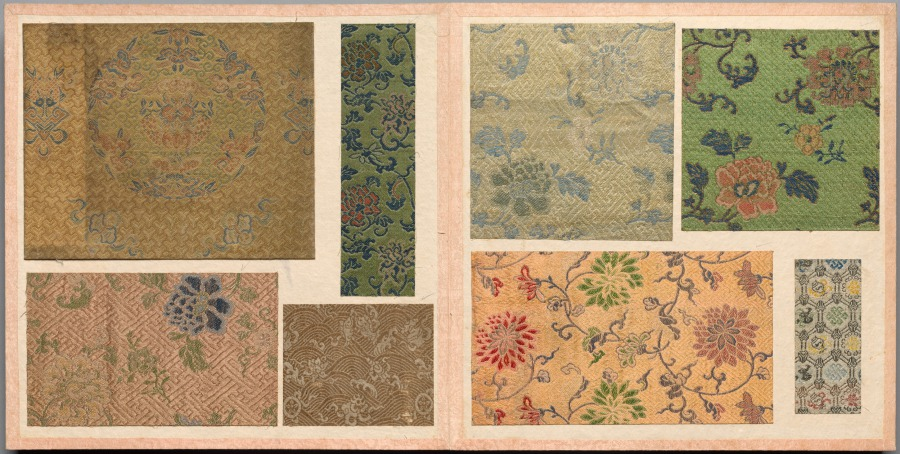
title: Album of Textile Samples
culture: Japan and China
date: 1700s–1800s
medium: silk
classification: Textile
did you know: This album contains 46 pages with 156 mounted Chinese or Japanese textile samples.